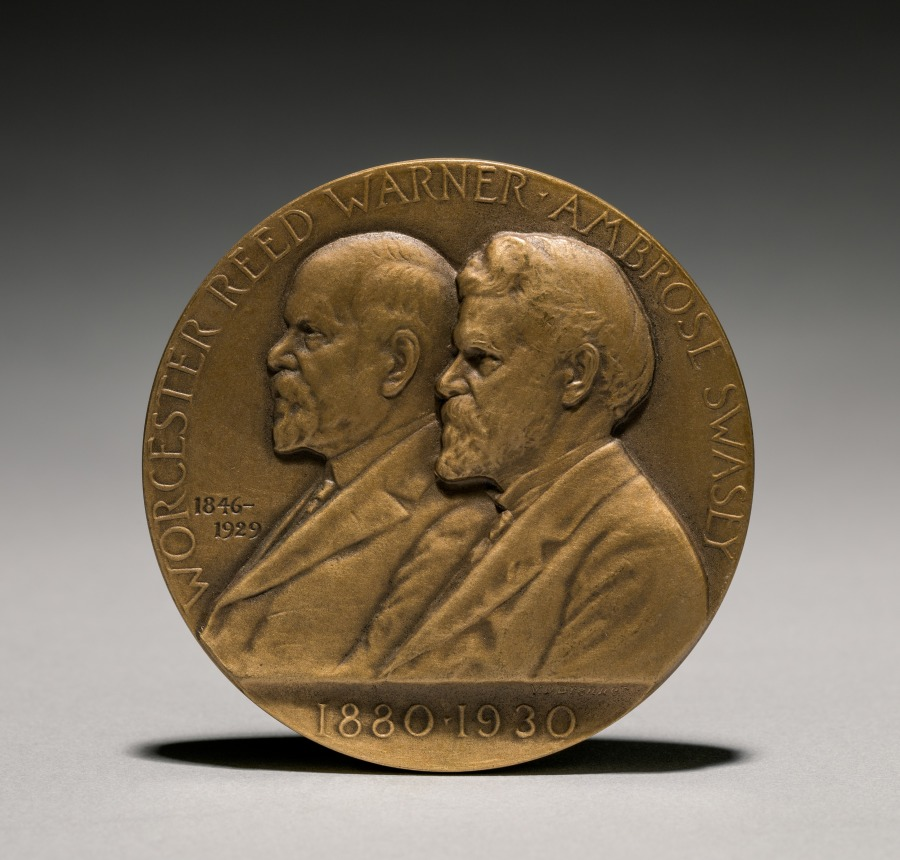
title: Medal: In Commemoration of the Fiftieth Anniversary - The Warner and Swasey Company (obverse)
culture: America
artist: Victor D. Brenner (American, 1871–1924)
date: 1930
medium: bronze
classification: Metalwork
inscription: encircling the busts: "WORCESTER REED WARNER . AMBROSE SWASEY"; center below: "1880-1920"; at left beside bust of Worcester R. Warner: "1846-1929"; under bust at right: "V. D. BRENNER."